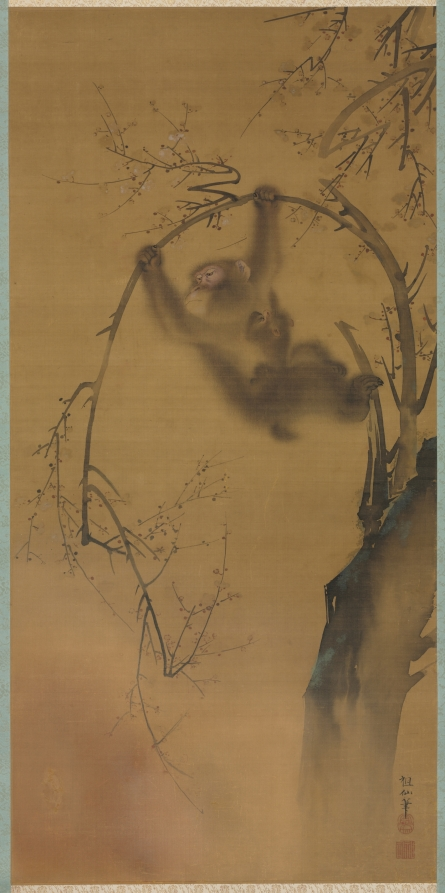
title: Monkeys in a Cherry Tree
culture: Japan, Edo period (1615–1868)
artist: Mori Sosen (Japanese, 1747–1821)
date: c. 1800–1821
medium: hanging scroll, mounted and framed, ink and color on silk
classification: Painting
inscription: signature on right